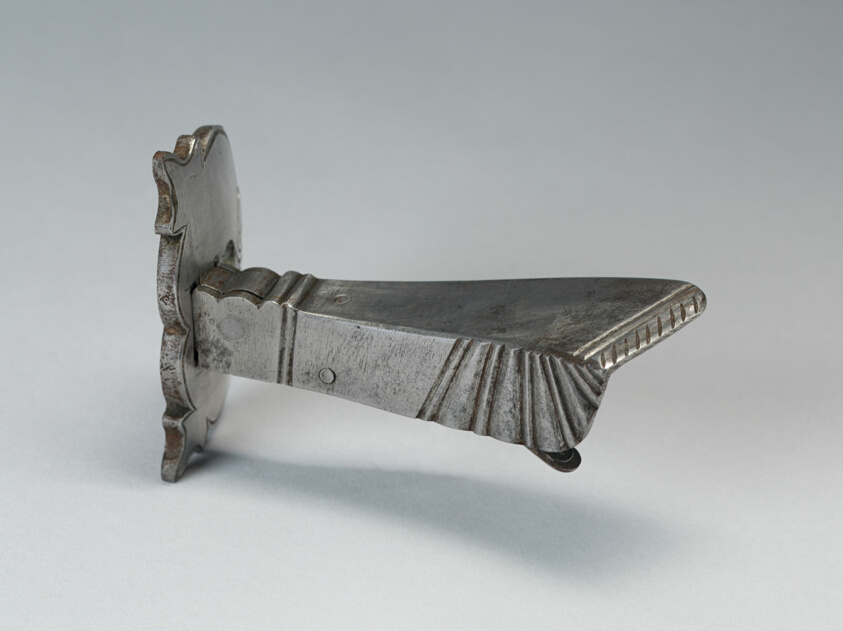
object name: Armor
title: Folding Lance Rest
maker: Italian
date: late 16th century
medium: Iron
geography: Germany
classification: suit-element; armor; arms and armor